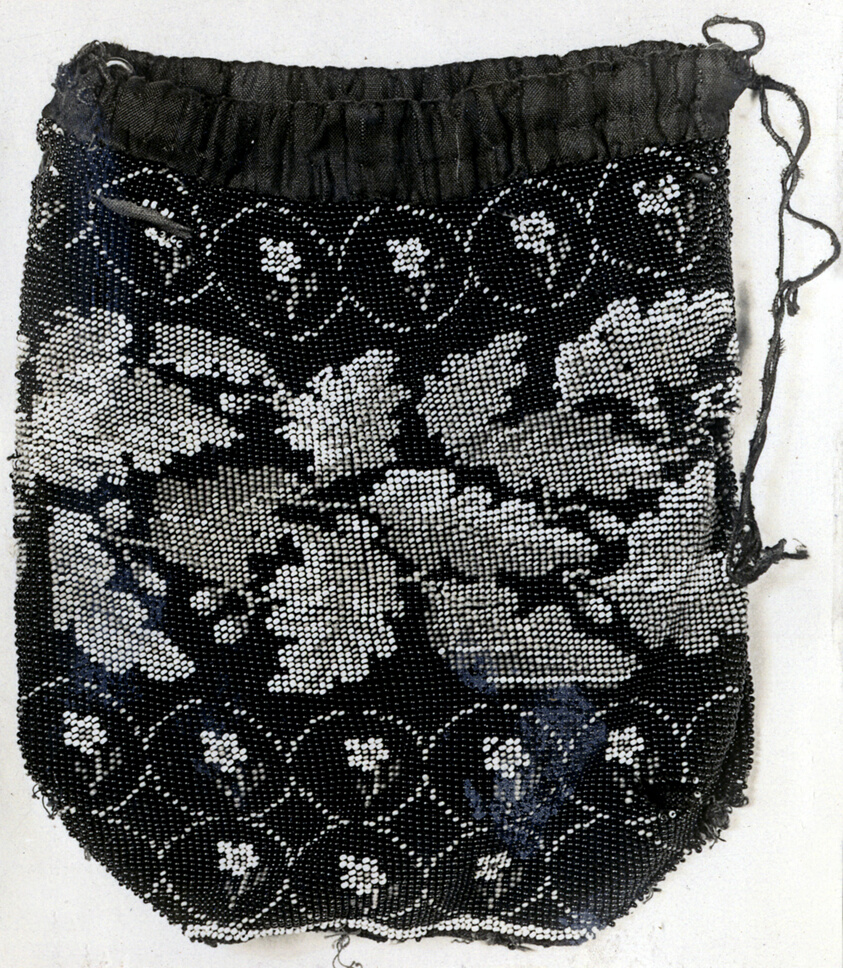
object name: Costume and Accessories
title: Bag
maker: France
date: 19th century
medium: Glass beads, round, opaque and transparent; worked in silk in buttonhole stitch without foundation textile; lined; fringe has been removed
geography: France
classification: textile; needlework (visual works); costume